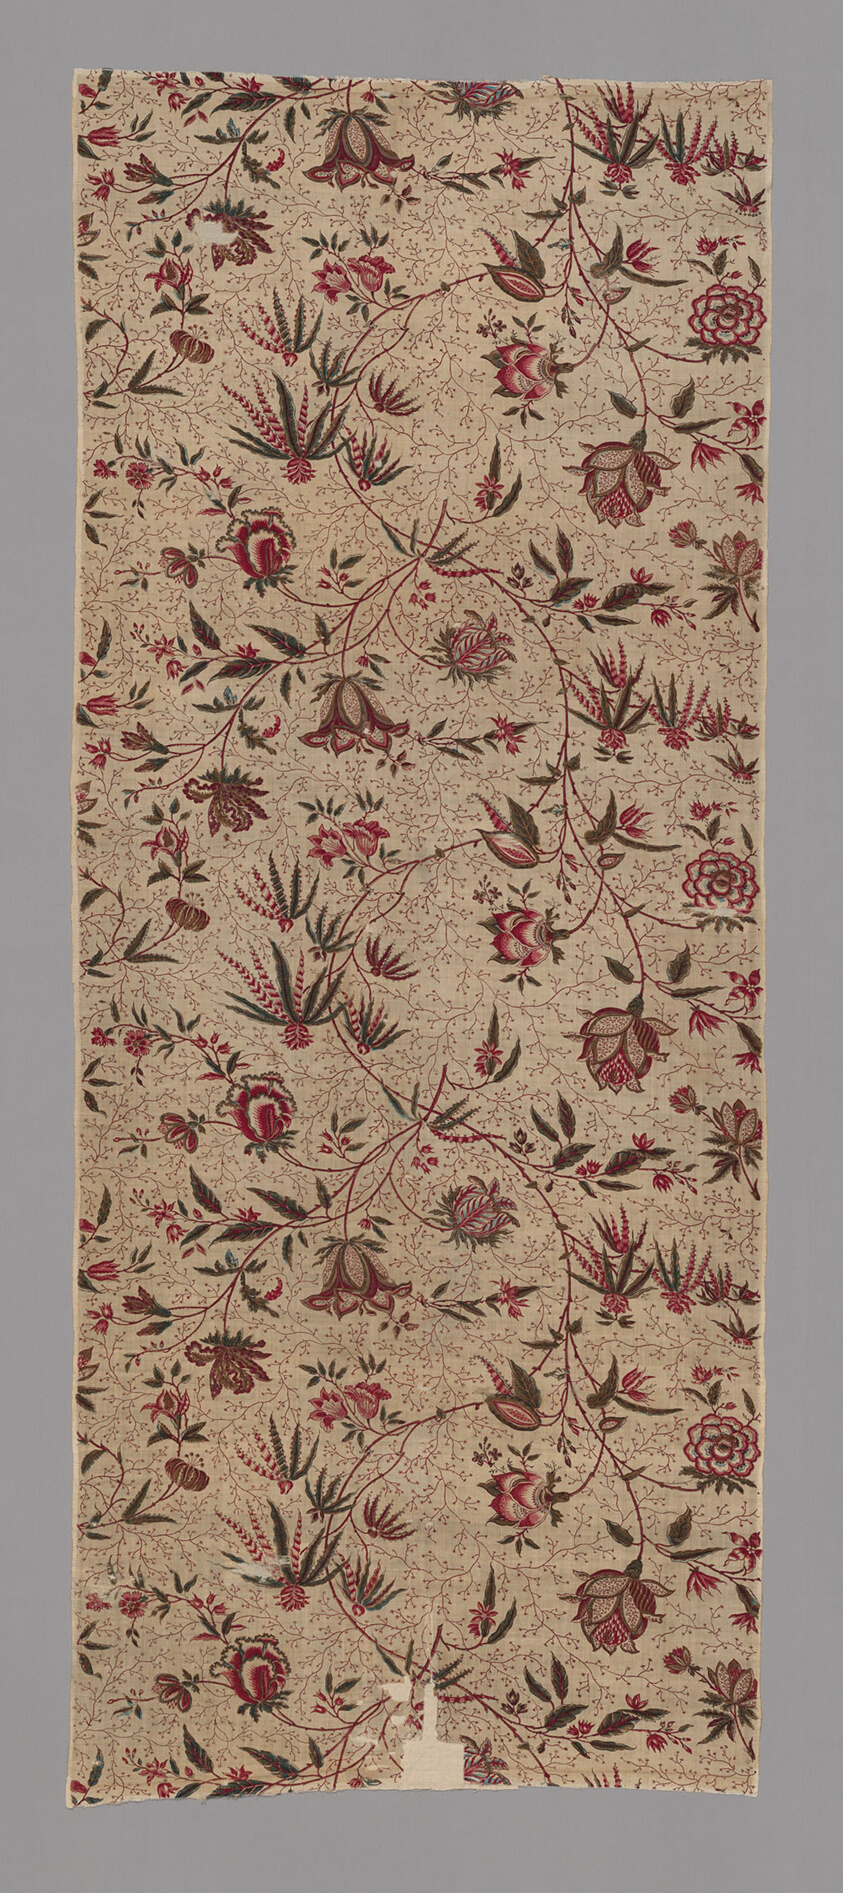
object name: Textile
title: Panel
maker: Possibly designed by Jean Baptiste Pillement; French, 1728–1808; France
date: 1775/1825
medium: Cotton and linen, plain weave; block printed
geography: France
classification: textile; weaving - printed; printed textile